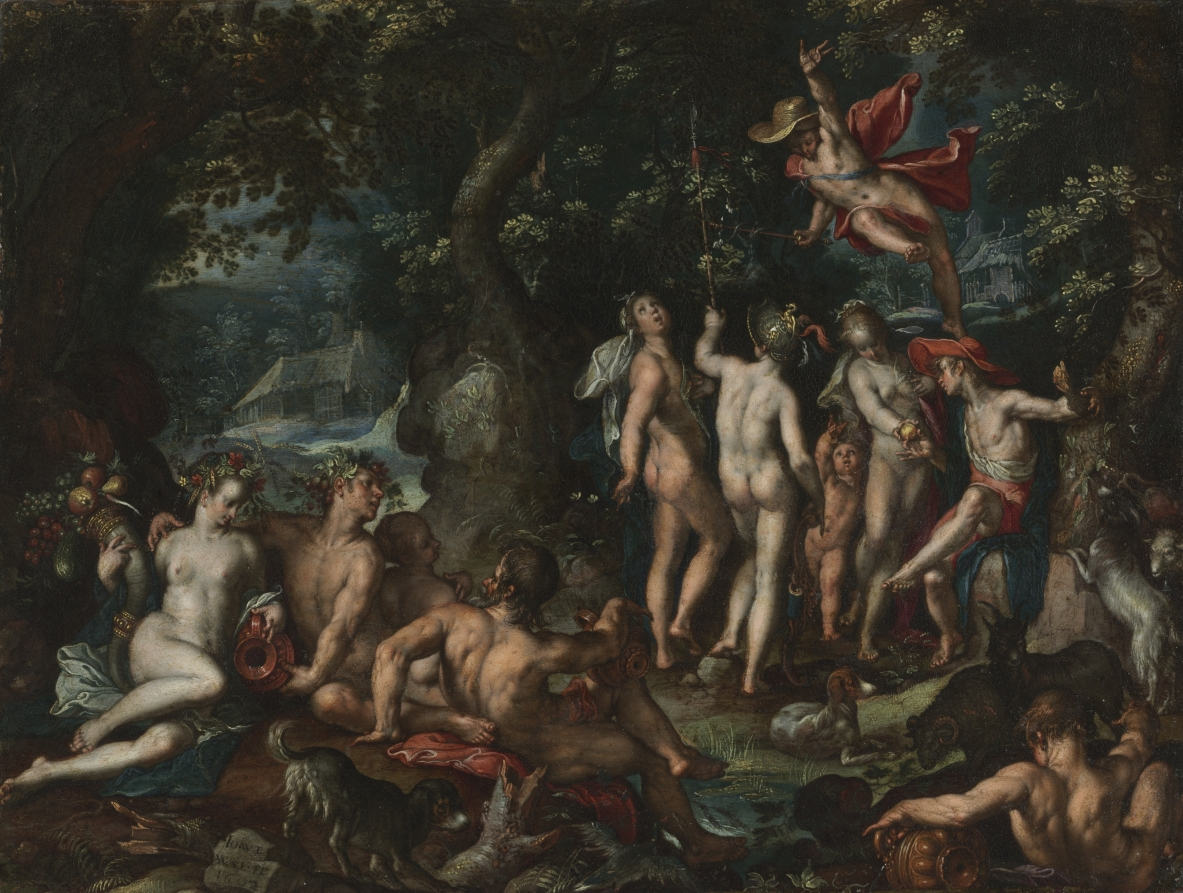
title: The Judgment of Paris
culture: Netherlands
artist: Joachim Anthoniz Wtewael (Dutch, 1566–1638)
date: 1602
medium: oil on copper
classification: Painting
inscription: signed lower left: IO. WTE / WAEL. FE / 1602 [TE, AE in monogram]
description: The Trojan prince Paris was asked to determine which goddess was the most beautiful. Hera (tothe left of the group) offered him political power, and Athena (seen from the back), military prowess, but Paris awarded the golden apple to Venus, the goddess of love, who promised him Helen, the most beautiful mortal in the world.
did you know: The artist dated and signed this work on a rock at the bottom right of the painting.